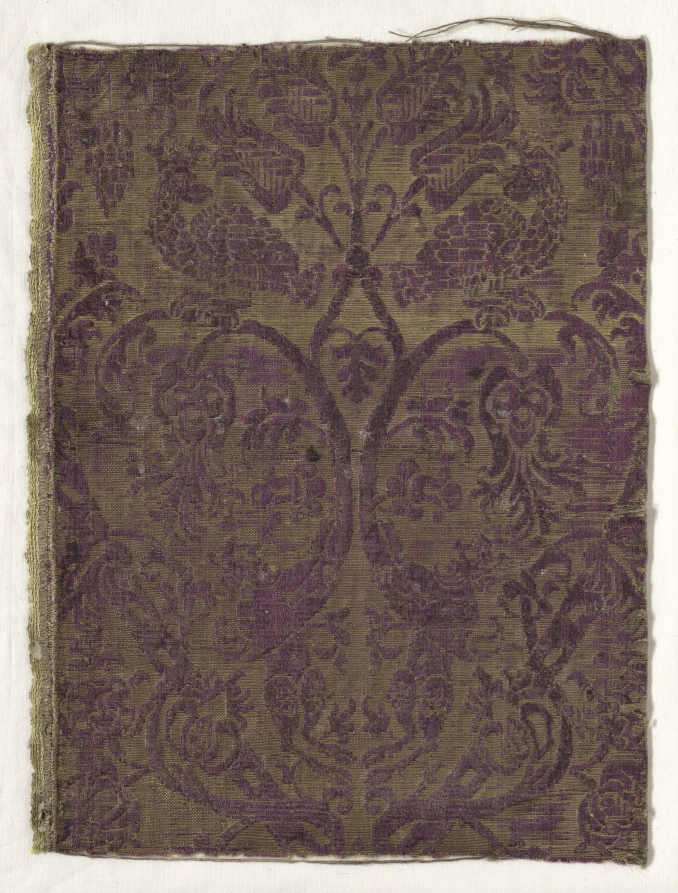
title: Fragment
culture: Spain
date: 1500s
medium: silk brocatelle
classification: Textile